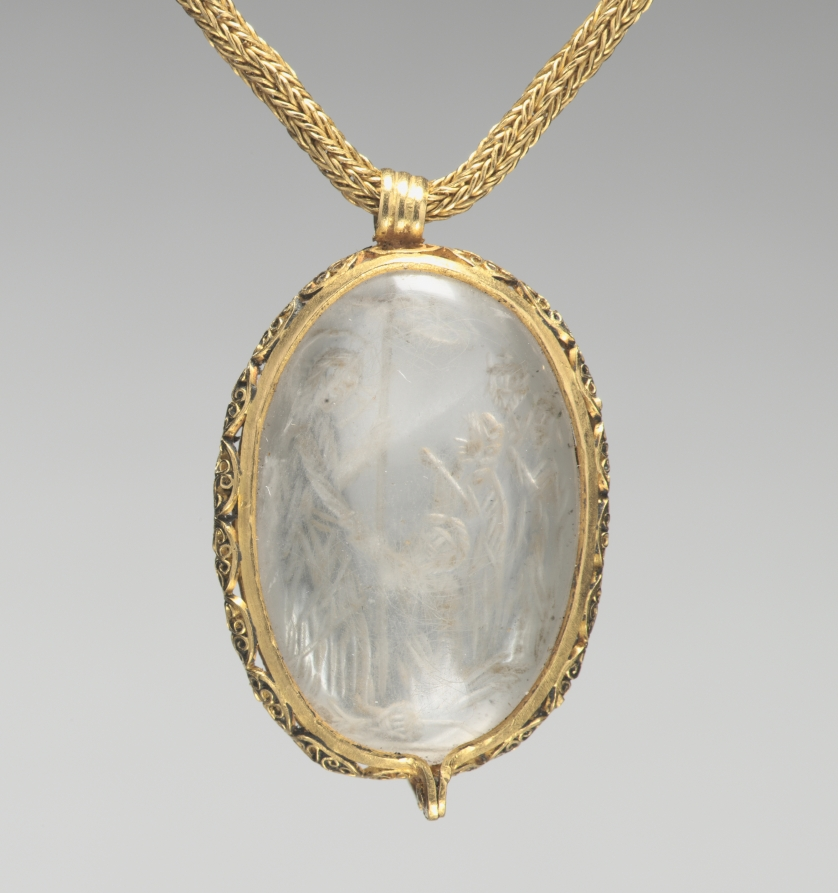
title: Pendant with Reverse Intaglio of the Anastasis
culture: Byzantium, late 6th century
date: late 500s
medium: rock crystal, with gold mount and chain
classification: Jewelry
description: This pendant consists of two dome-shaped pieces of rock crystal, one of which has the design cut into its reverse. The subject is the Anastasis, which shows Christ entering the gates of Hell and releasing Old Testament figures said to have believed in his divinity before his birth. On the left, Christ (with a cross staff) reaches out to Adam, who kneels before him. Eve stands behind, also reaching out her hand. The chain may be of later date.